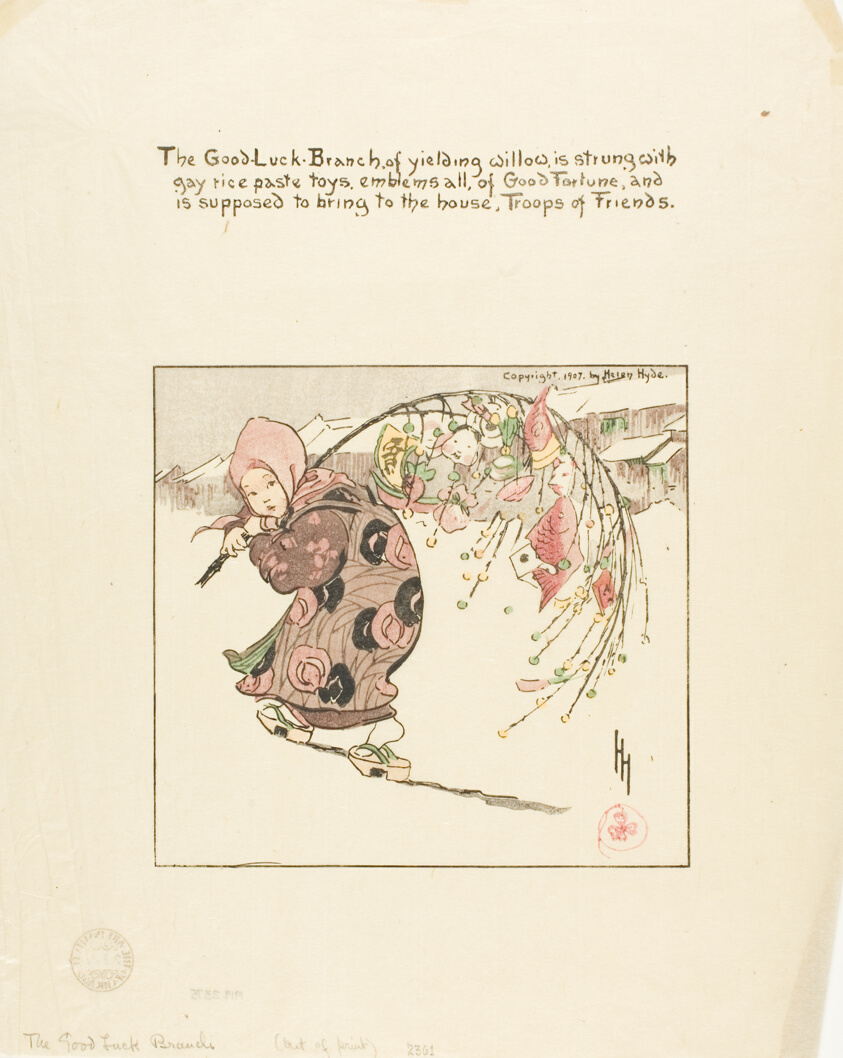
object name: Print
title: The Good-Luck Branch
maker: Helen Hyde (American, 1868-1919)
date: 1907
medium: Color woodcut on paper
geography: United States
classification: woodcut; print; prints and drawing